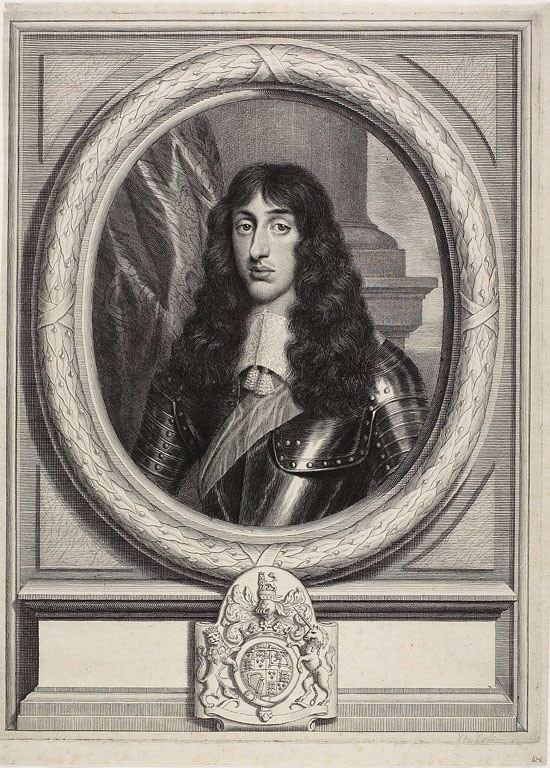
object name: Print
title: The Duke of Gloucester (Henry Stuart)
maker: Cornelis van Dalen II; Dutch, seventeenth century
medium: Engraving on ivory laid paper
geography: Netherlands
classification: engraving; print; prints and drawing